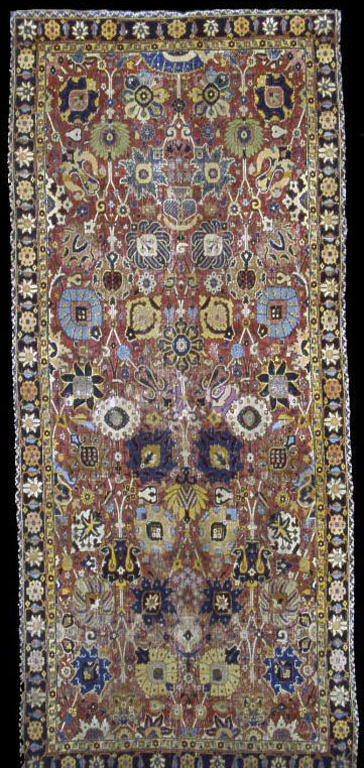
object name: Textile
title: Carpet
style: kirman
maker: Iran, Kerman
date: 1601/25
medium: Cotton and wool, plain weave with supplementary wrapping wefts forming cut pile through a technique known as "Persian" (Sehna) knots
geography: Iran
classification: textile; weaving - carpet